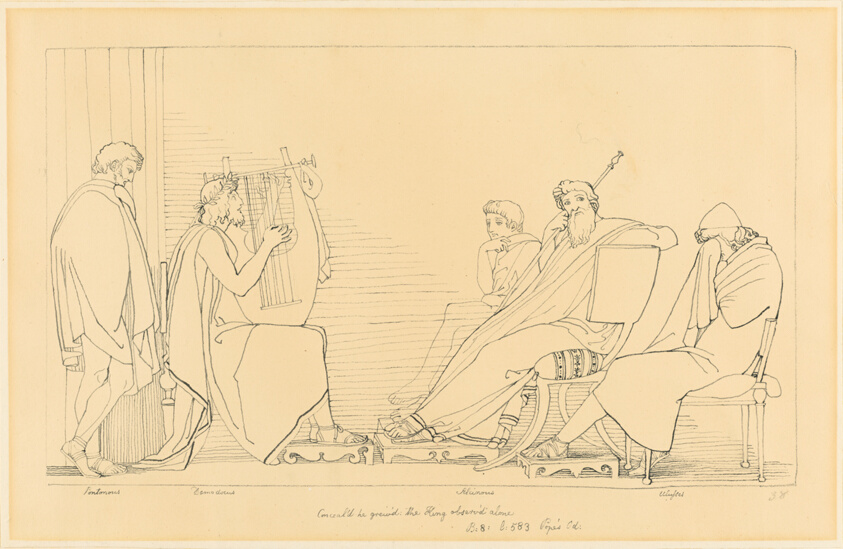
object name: Drawing and Watercolor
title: The Song of Demodocus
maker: John Flaxman, II; English, 1755-1826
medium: Pen and black ink on tan wove paper, laid down on buff wove paper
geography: England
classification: pen and ink drawings; drawings (visual works); prints and drawing